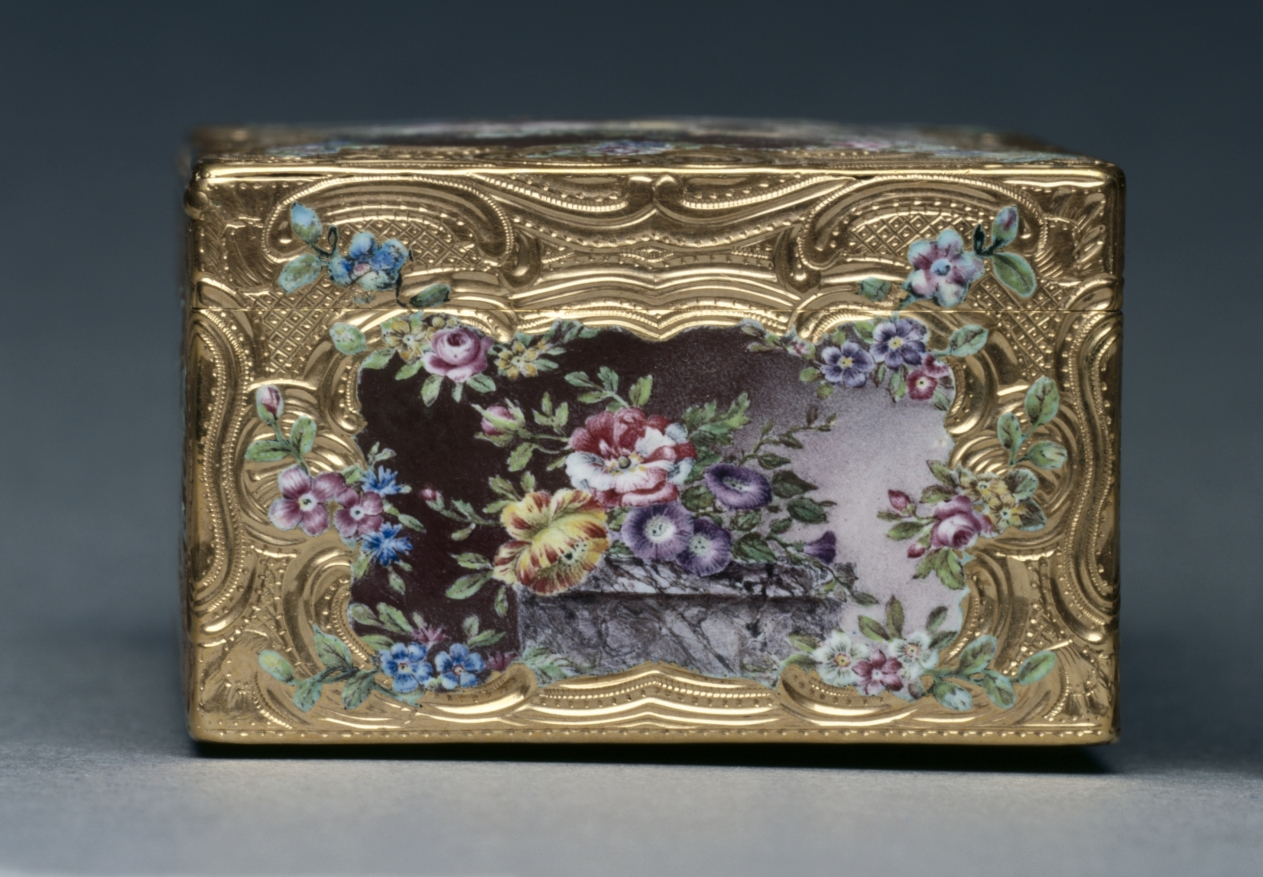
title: Snuff Box (Tabatière)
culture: France, 18th century (style of Louis XV)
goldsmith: Francois Guillaume Tiron (French)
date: 1756–57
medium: gold and enamel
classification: Miscellaneous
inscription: [Maker's mark of Francois-Guillaume Tiron, master goldsmith in 1747, inside cover; left wall]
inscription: [Warden's mark for Paris, 1756-1757, inside cover]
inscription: [Charge mark of Julien Berthe, Paris, 1750-1756, inside cover; left wall]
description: The miniature paintings that decorated snuff boxes were depicted in intricate detail requiring complex technical skill. This box’s miniatures are painted with enamel en plein, meaning the enamel has been applied directly to the metal of the box. A different enameling technique, basse-taille, is used to depict the doves and floral borders. Here, the gold has been chiseled away and filled with translucent enamel in order to produce a three-dimensional effect.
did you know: In the mid-1700s François-Guillaume Tiron worked alongside his brother, Jean-Marie Tiron, one of the most celebrated makers of gold boxes of the 18th century.